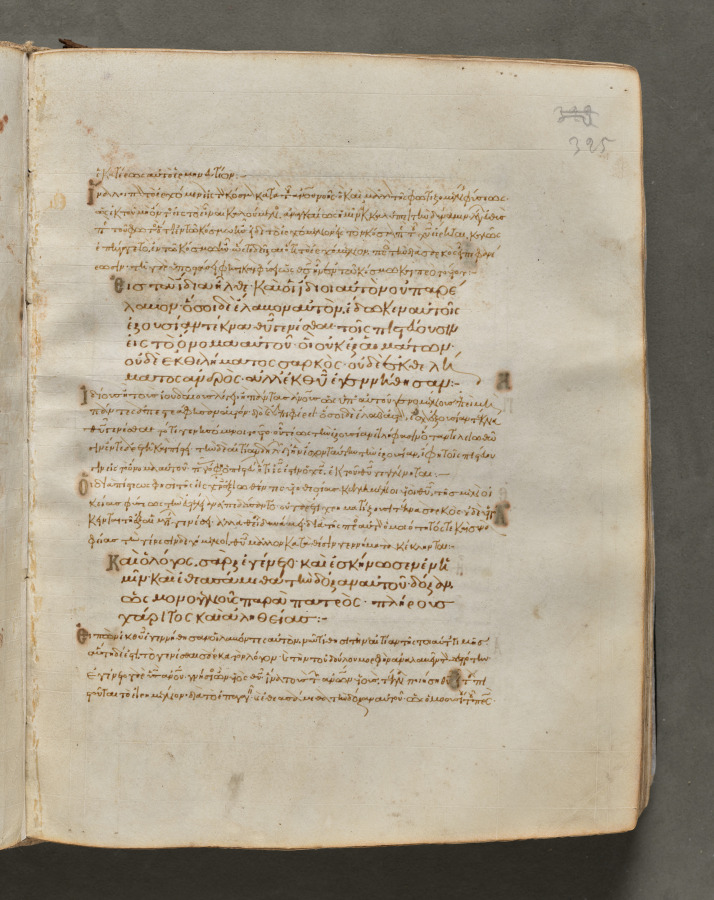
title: Text, folio 325 (recto), from a Gospel Book with Commentaries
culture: Byzantium, Constantinople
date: c. 1000–1100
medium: ink, tempera, and gold on vellum; leather binding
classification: Bound Volume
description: Each of the four gospels in this book opens on a page with brilliantly illuminated borders depicting the author of the text as well as birds—principally peacocks, symbols of the immortality of the soul—and fountains, representing the fountain of life and the salvation of the soul. This volume consists of 428 leaves with texts in Greek. Its level of sophistication suggests that it was probably written and decorated in a monastery in Constantinople.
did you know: Gospel books were carried in procession through Byzantine churches.